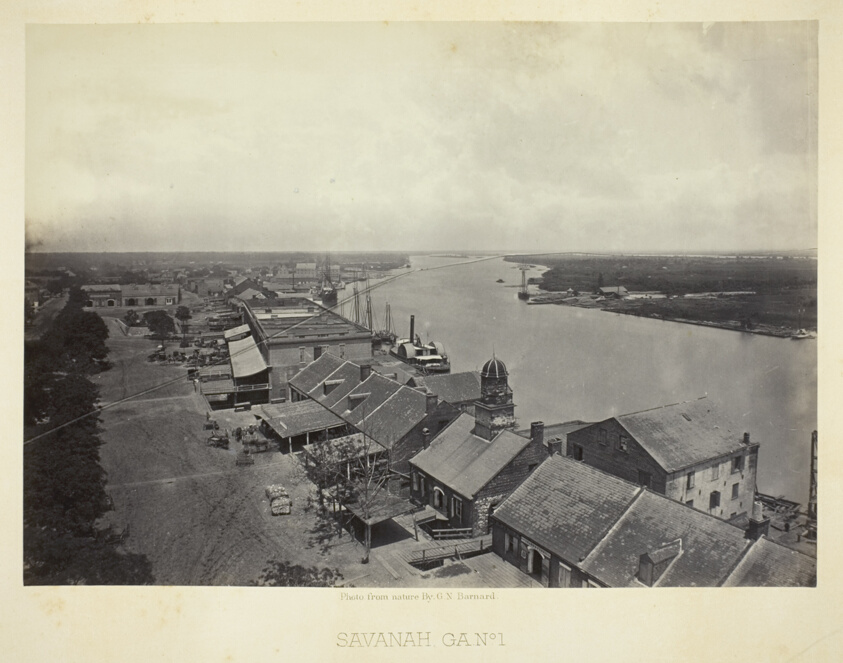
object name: Photograph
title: Savannah, GA, No. 1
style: 19th century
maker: George N. Barnard (American, 1819–1902)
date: 1866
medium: Albumen print, plate 49 from the album "Photographic Views of the Sherman Campaign" (1866)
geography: United States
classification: albumen silver print; photographic process; photography; photograph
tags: Collected by Hugh Edwards, Sherman's Campaign 1866